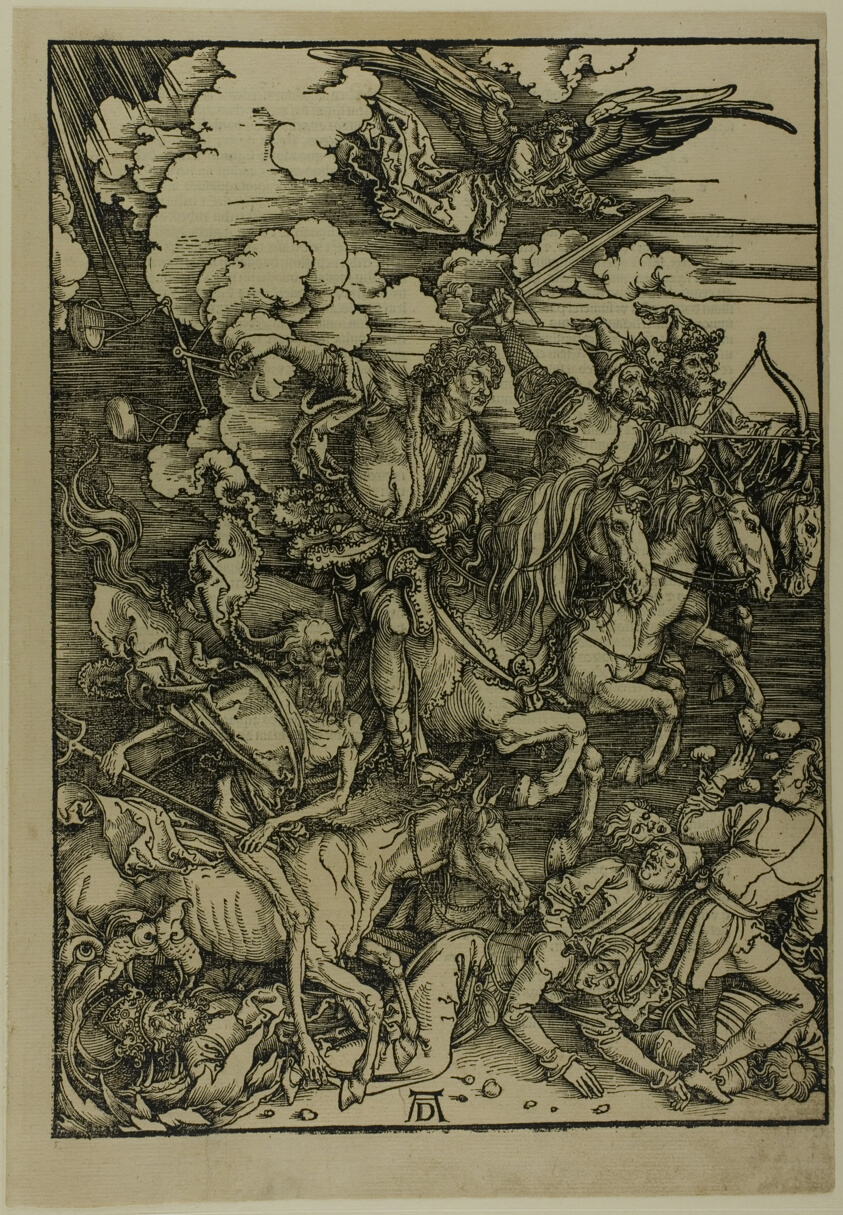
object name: Print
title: The Four Horsemen of the Apocalypse, from The Apocalypse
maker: Albrecht Dürer (German, 1471-1528)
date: c. 1496–98, published 1511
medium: Woodcut in black on tan laid paper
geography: Germany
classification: woodcut; print; prints and drawing; paper